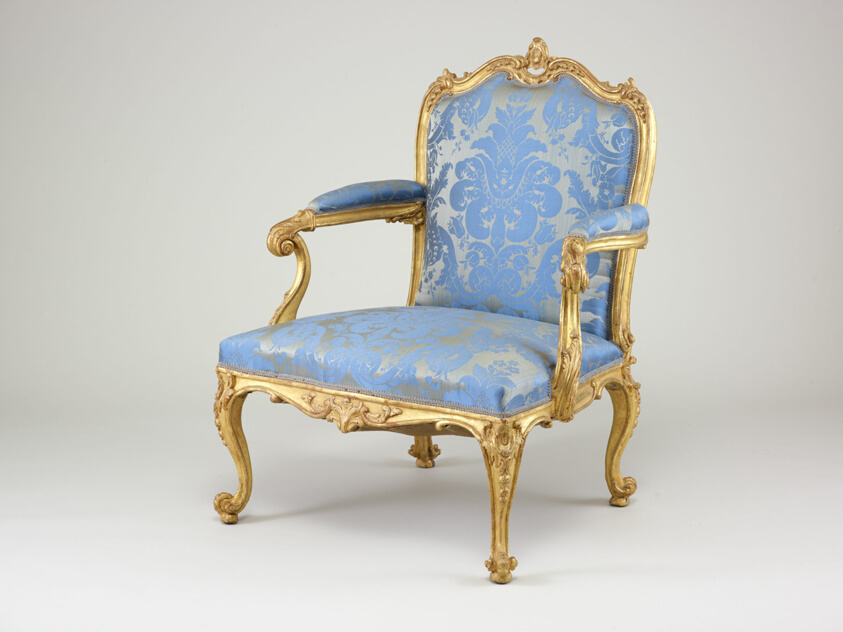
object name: Furniture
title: Armchair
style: Rococo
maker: England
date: c. 1765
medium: Gessoed and gilt beechwood, modern upholstery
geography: England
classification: seating; european decorative arts; furniture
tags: furniture